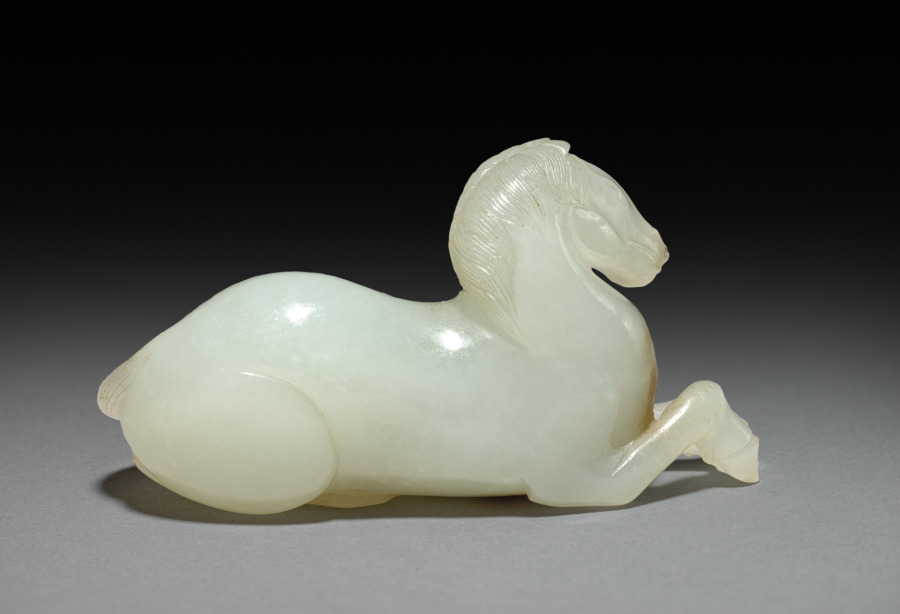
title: Horse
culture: China, Qing dynasty (1644-1911)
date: 1600s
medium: jade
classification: Jade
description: In China, access to political power was granted to those who passed the civil service examinations, a system that offered official service only at a high level of education. Chinese literati-officials whose daily routine was administrative work in an office, enjoyed precious objects on their writing desks that offered distraction and demonstrated good taste. By the Ming (1368–1644) and Qing (1644–1911) dynasties, these utensils of the literati studio became also collectibles and were treasured as artworks. Desk objects included paper weights; seals and seal paste boxes; brush rests, wrist rests and brush holders; water droppers, ink cakes, miniature mountains, and albums, all ranging in material from jade, gilt bronze, lacquer, and wood to porcelain.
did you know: The white jade surface of the horse has been brightly polished, but portions of the original stone's "skin" remain on the base and below the head.